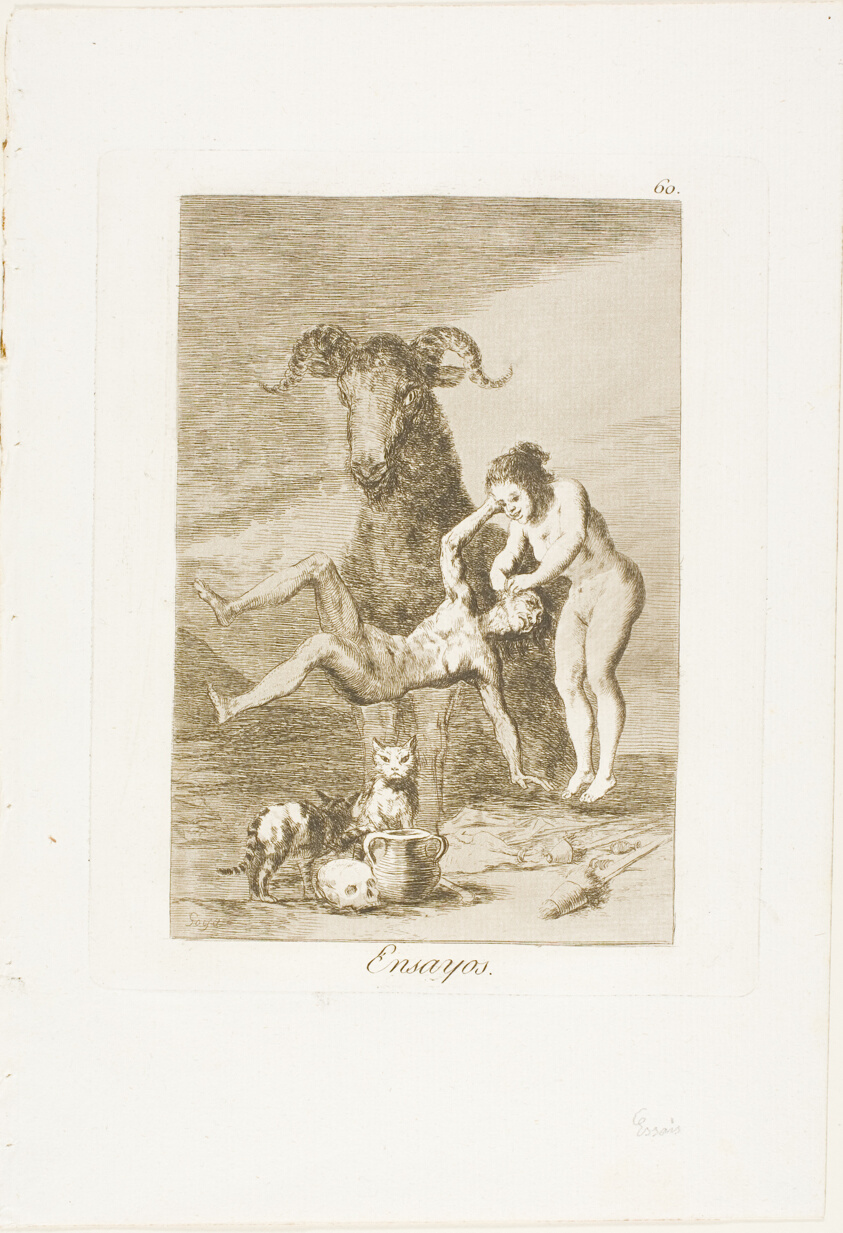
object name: Print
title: Trials, plate 60 from Los Caprichos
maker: Francisco José de Goya y Lucientes (Spanish, 1746-1828)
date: 1797/99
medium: Etching and aquatint on ivory laid paper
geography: Spain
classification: etching; print; prints and drawing